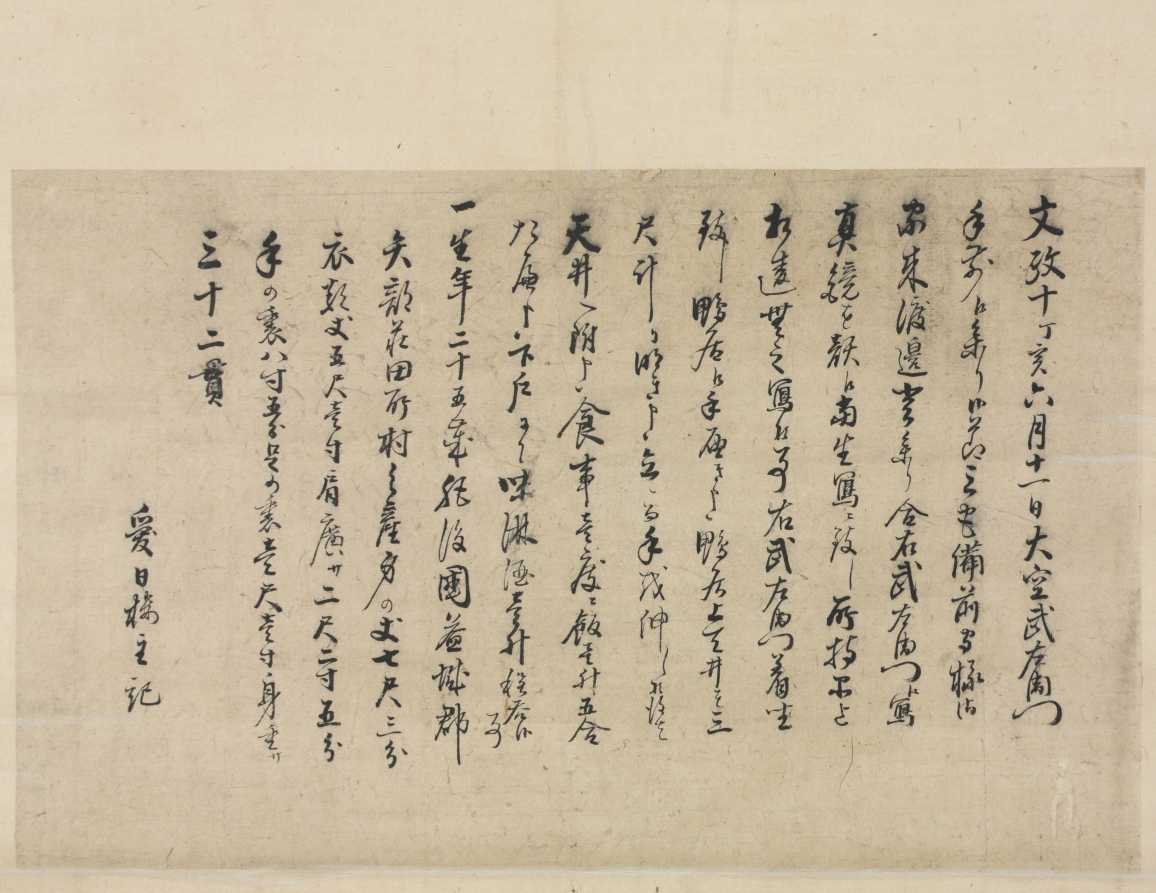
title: Portrait of Ōzora Buzaemon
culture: Japan, Edo period (1615–1868)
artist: Watanabe Kazan (Japanese, 1793–1841)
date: 1827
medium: hanging scroll; ink and color on paper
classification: Painting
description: Over seven feet tall, Ōzora Buzaemon became a tabloid sensation when he arrived in Edo (Tokyo) in 1827 . His handprints were cherished souvenirs, and his image was sold on woodblock prints. As inscriptions on the scroll detail, Watanabe Kazan met Buzaemon at the residence of a noted Confucian scholar. Using a camera obscura–type device—a tool that uses light to project an image onto a surface—he made this preliminary drawing for a painting. The portrayal depicts Buzaemon’s discomfort in being stared at.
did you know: Watanabe Kazan was interested in Rangaku (Dutch Learning).